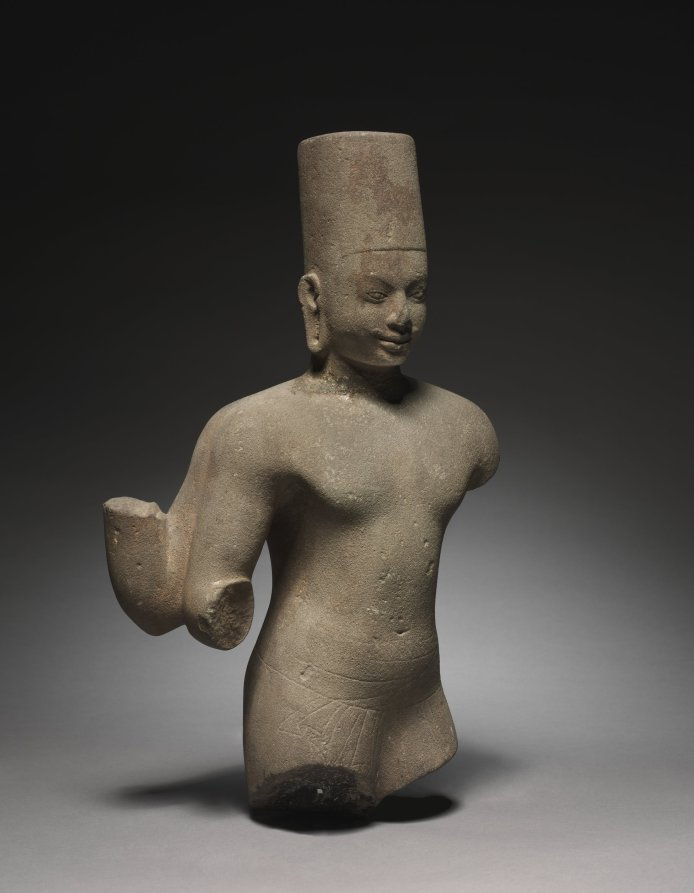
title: Vishnu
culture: Cambodia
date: 650–700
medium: sandstone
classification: Sculpture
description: Vishnu has the features of royalty, indicated by the high mitre-like crown with the flat top, distinctive to types made at the site of Prasat Andet. His status as a god, greater than any earthly king, is indicated by the four arms, traces of which are still visible. The sensitive rendering of the eyes and slight smile are characteristics of Cambodian sculpture, and during this early period, the form of the body reveals some relatively naturalistic musculature and treatment of the garments. He wears the Southeast Asian lower garment called sampot, around which his upper garment is loosely tied. It is Vishnu who incarnates himself into the world in avatars, including Krishna and the boar Varaha. Here we see his iconic form as Vishnu himself.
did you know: The deity is four-armed with the arms running parallel from the shoulders and then bifurcating at the elbows.